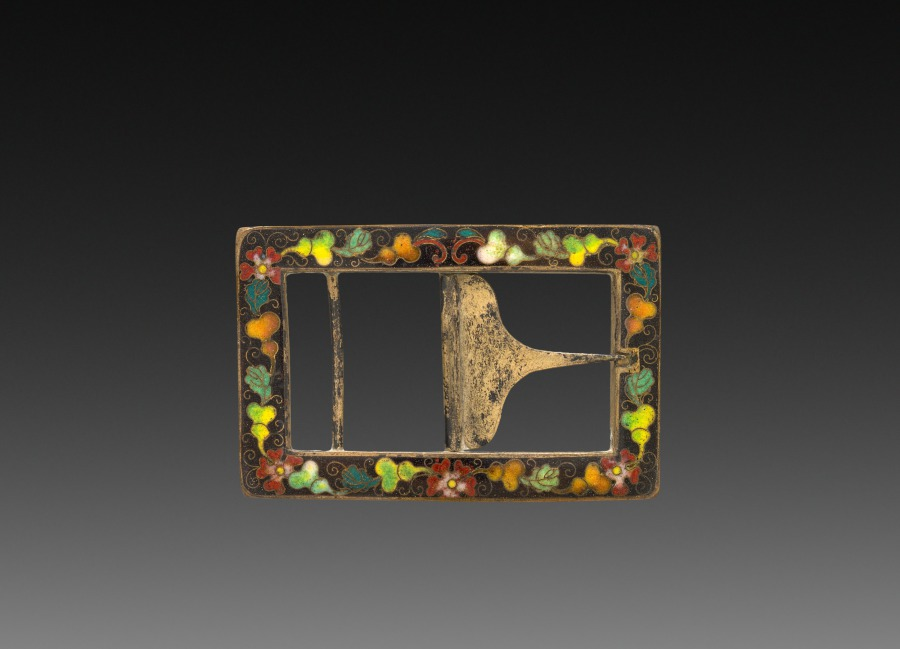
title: Belt Buckle with Radishes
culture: Japan, Meiji period (1868–1912) to Taishō period (1912–26)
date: early 1900s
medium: cloisonne enamel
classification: Enamel